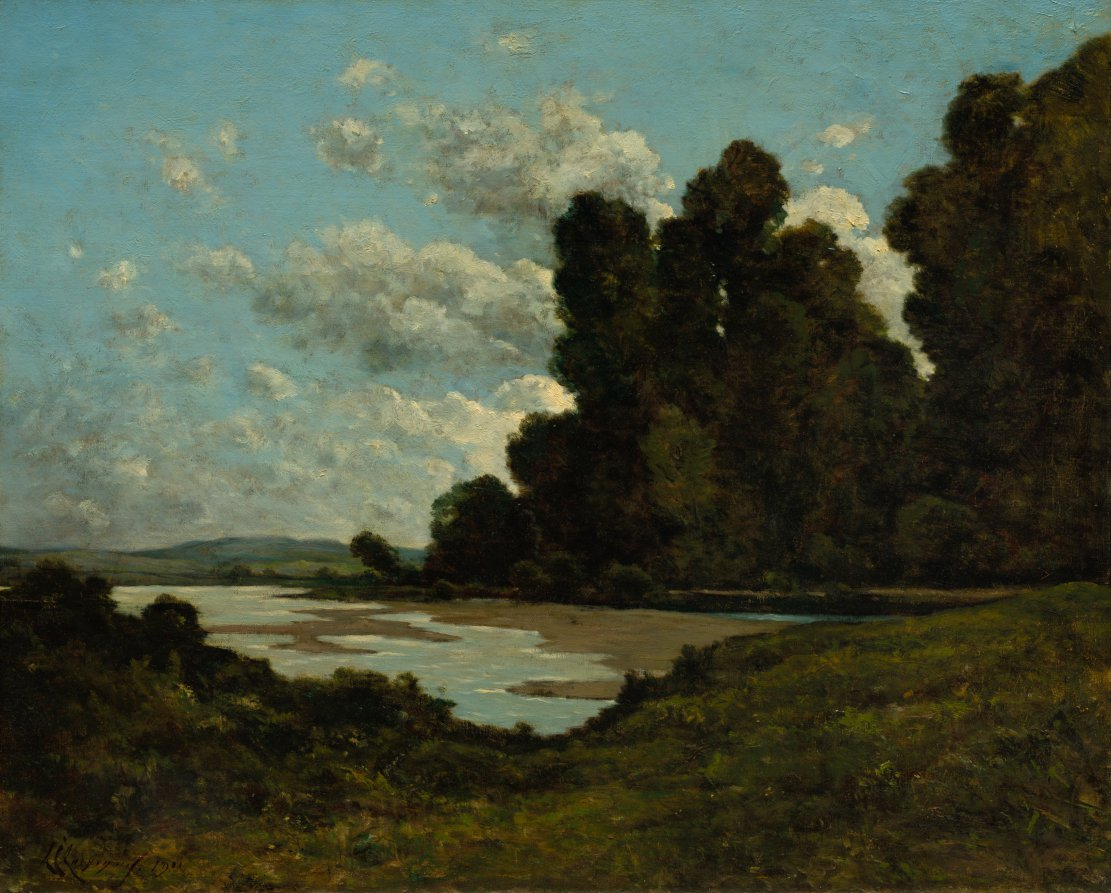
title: The River Loire at Nevers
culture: France, 19th century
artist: Henri Joseph Harpignies (French, 1819–1916)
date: 1901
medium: oil on fabric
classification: Painting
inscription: Signed lower left: h.j harpignies. 1901